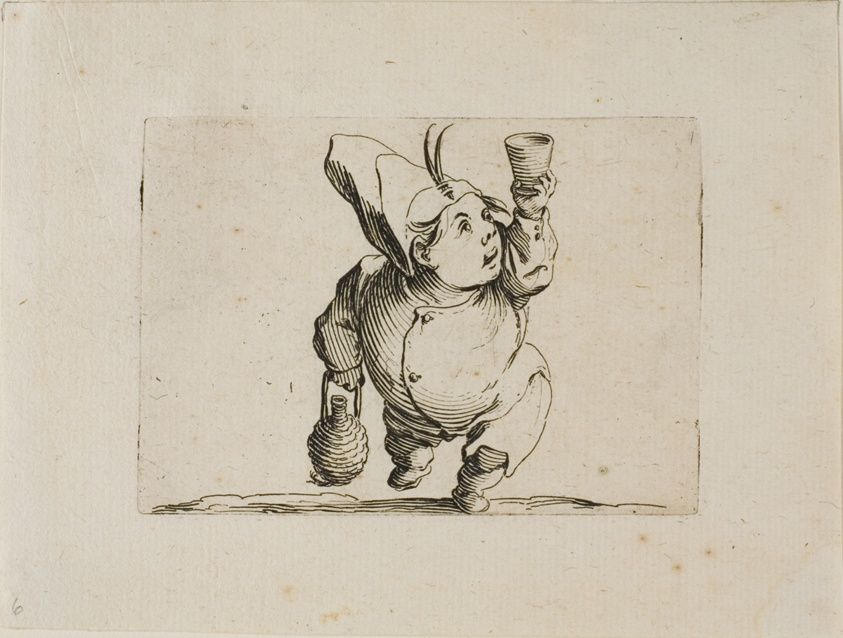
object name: Print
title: The Drinker Seen from the Front, from Varie Figure Gobbi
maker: Jacques Callot (French, 1592-1635)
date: 1616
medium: Etching on paper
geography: France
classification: etching; print; prints and drawing